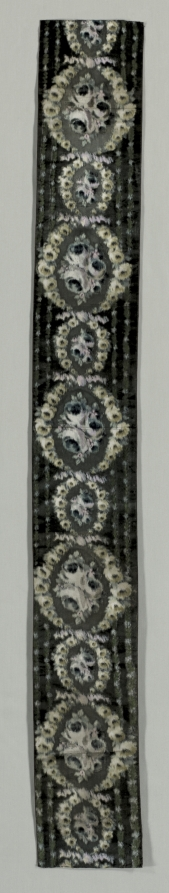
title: Velourau Sable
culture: France, Germany, Switzerland, America?, late 19th - early 20th century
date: late 19th - early 20th century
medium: velvet weave, silk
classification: Velvet